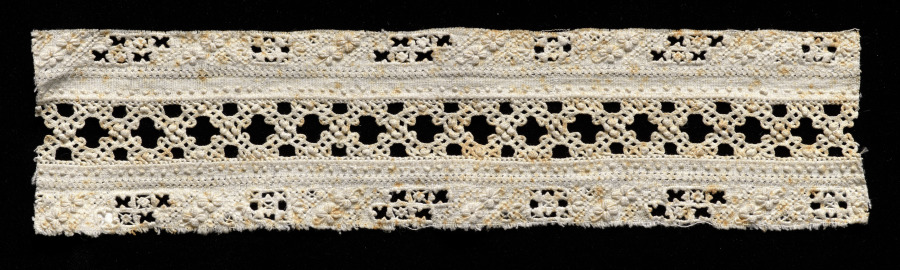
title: Lace Band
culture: Italy, Venice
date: 1540–60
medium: Linen: needle lace (cutwork and reticella) and bobbin lace insertion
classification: Lace